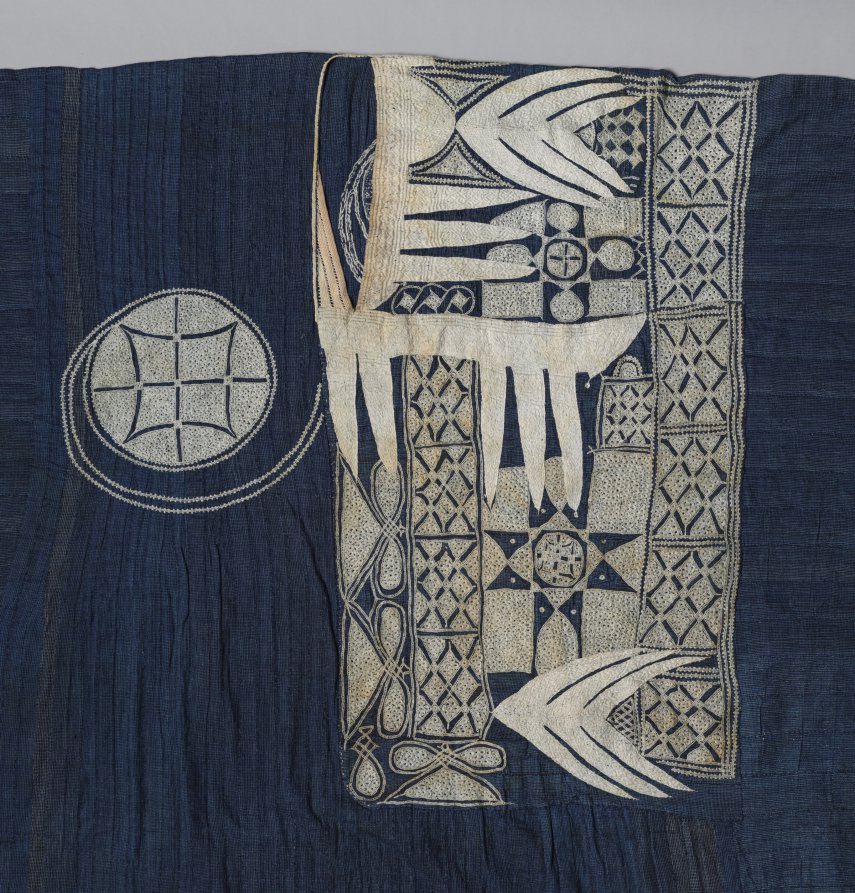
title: Prestige robe (riga)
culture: Africa, West Africa, Nigeria, probably Hausa-style or Nupe-style weavers and embroiders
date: late 1800s–by 1910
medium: Cotton, silk, and indigo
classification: Garment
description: Elite Nigerian men wore voluminous status garments variously called riga (Hausa), agbádá (Yorùbá), boubou (French), or mbubb (Wolof). Punctuated with white silk, this strip-woven riga’s inky blue was achieved by repeatedly dipping threads into indigo dye before weaving them. Embroiderers were often skilled Arabic calligraphers; the motifs here once had protective Islamic symbolism. The front pocket features the pointed “eight knives” (aska takwas) and a leaf (gambiya) associated with the Nupe peoples. At back, a spiral leads the wearer toward God. Magenta silk imported via trans-Saharan routes lines the hem. Rigan historically held transcultural appeal; today, they are pan-Nigerian male national dress.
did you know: Its owner's movements would have revealed a flash of magenta silk (an expensive trade good) along the hem of this riga, emphasizing his high status.